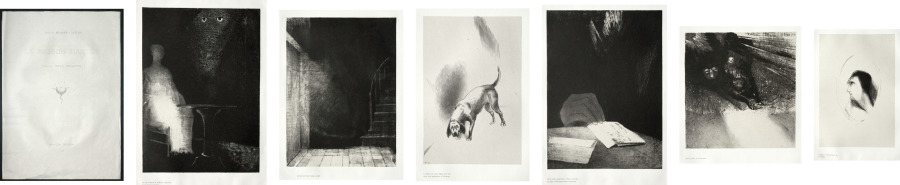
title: The Haunted House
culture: France, late 19th Century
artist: Odilon Redon (French, 1840–1916)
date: 1896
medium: six lithographs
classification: Print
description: Odilon Redon was a voracious reader of contemporary literature, and such texts often influenced his art. This series was inspired by The Haunted and the Haunters, an 1859 novel by British writer Edward Bulwer-Lytton. Redon’s prints capture the book’s mysterious tone and emphasis on the supernatural through vague but evocative imagery that sometimes borders on abstraction. By this time a seasoned expert in lithography, the artist collaborated with master printer Auguste Clot. Their combined technical skills allowed for the rich tonal variation seen here, made by turning Redon’s lithographic crayon on its side, layering various marks, and even scratching directly into the surface of his stone.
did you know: One of Redon's greatest patrons, the occultist René Philipon, commissioned this portfolio as a supplement for his French translation of Bulwer-Lytton's The Haunted and the Haunters.